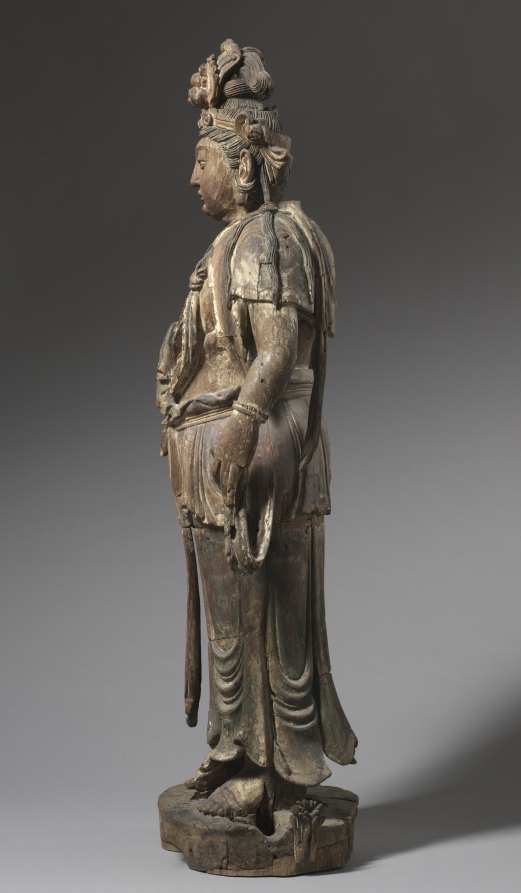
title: Standing Bodhisattva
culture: China, Jin dynasty (1115-1234)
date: 1200s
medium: wood with traces of polychromy and gold leaf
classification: Sculpture